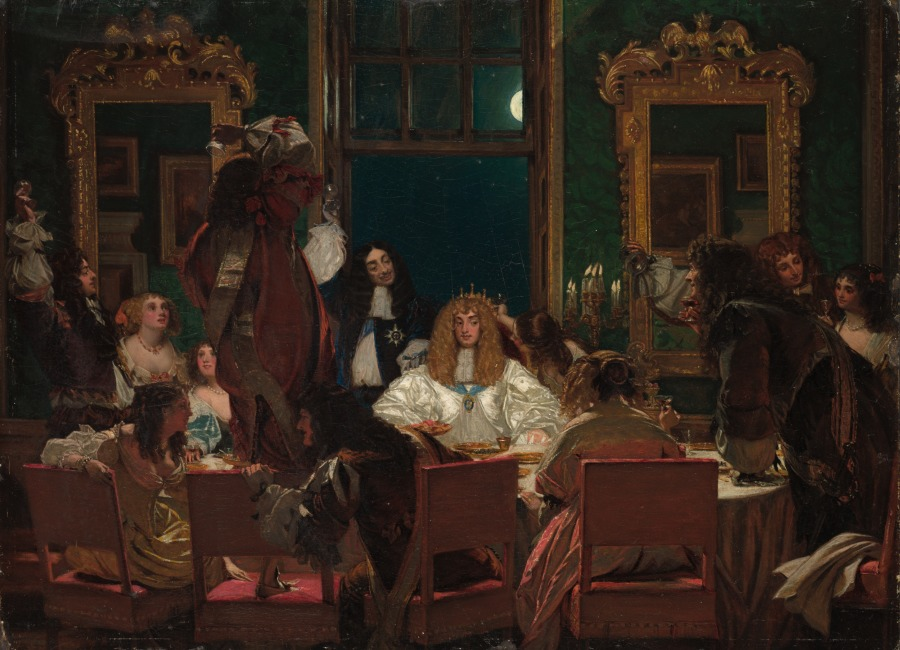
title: The Life of Buckingham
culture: England, 19th century, Victorian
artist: Augustus Leopold Egg (British, 1816-c. 1863)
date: c. 1855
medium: oil on board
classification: Painting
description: Augustus Leopold Egg’s The Life of Buckingham depicts a fictional moment in the debauched, roguish life of George Villiers (1628–1687), 2nd Duke of Buckingham (seated at the center, wearing white). Although the scene is invented, the merrymakers and courtesans depicted around the table (among them King Charles II, to Buckingham’s right) were characters the duke would have personally known and were familiar to Victorian audiences who delighted in the cautionary tale of excess.